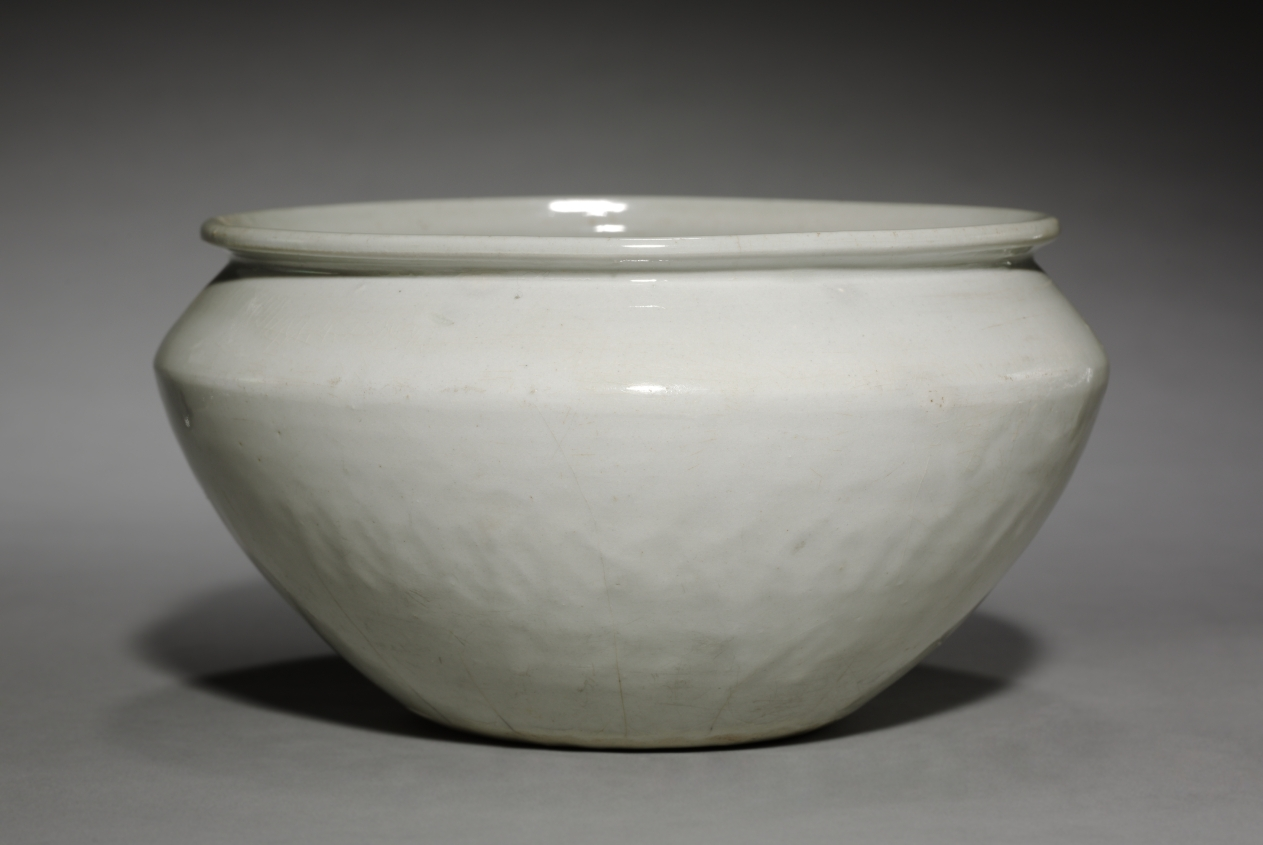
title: Bowl: Southern White Ware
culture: China, Tang dynasty (618-907) - Five dynasties (907-960)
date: late 800s-early 900s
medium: Glazed porcelain, Southern white ware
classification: Ceramic